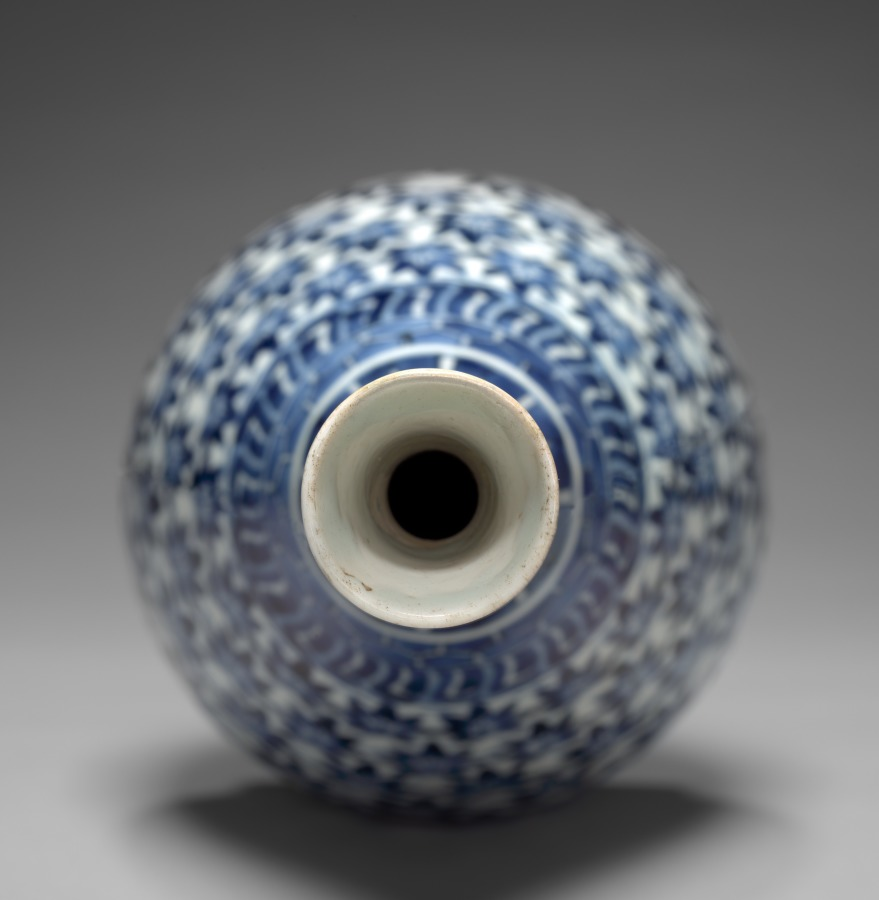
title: Bottle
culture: Japan, Edo period (1615–1868)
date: early 1600s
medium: porcelain painted in underglaze blue (Hizen ware, Arita type, Imari style)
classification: Ceramic